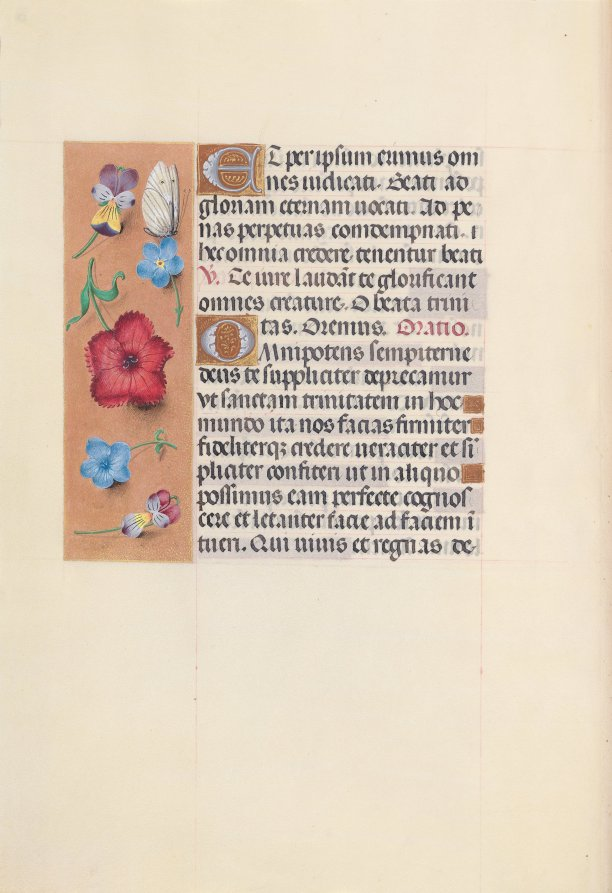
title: Hours of Queen Isabella the Catholic, Queen of Spain: Fol. 22v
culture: Flanders, Ghent and Bruges, late 15th century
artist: Master of the First Prayerbook of Maximillian (Flemish, c. 1444–1519)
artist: and Associates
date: c. 1500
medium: ink, tempera, and gold on vellum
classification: Bound Volume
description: This manuscript was illuminated by a circle of at least five highly organized manuscript painters active in the Flemish cities of Ghent and Bruges. The principal illuminator was Alexander Bening, who painted the majority of the book's miniatures. Manuscripts produced by this circle of artists are renowned for the decoration of their borders, which typically feature a rich variety of realistically-painted flowers, birds, and butterflies. This prayer book, called a book of hours, was intended not for a cleric, but for the private devotions of a lay person-in this case, Isabella the Catholic, Queen of Spain (1451-1504). Isabella's coat of arms embellishes the book's frontispiece. It is unlikely that the book was commissioned by the Queen herself; rather, she probably received it as a diplomatic gift from someone courting her patronage, perhaps Cardinal Francisco Jimenez de Cisneros. A Franciscan friar, Jimenez was dependent upon Isabella for his advancement, first to the post of Queen's confessor in 1492, and then to Archbishop of Toledo in 1495.